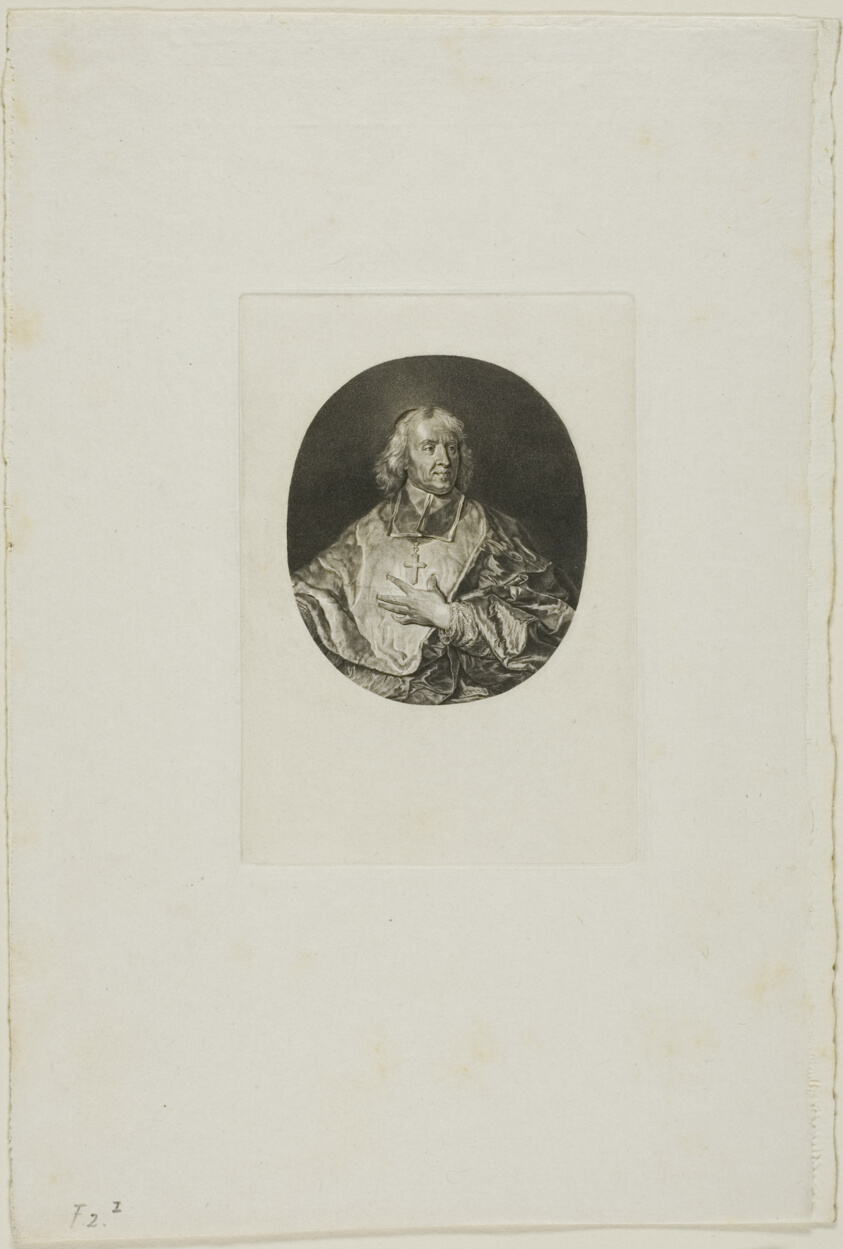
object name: Print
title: J-B. Bossuet: Bust Portrait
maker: Jean-Baptiste de Grateloup (French, 1735-1817)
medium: Aquatint on paper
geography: France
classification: aquatint; print; prints and drawing